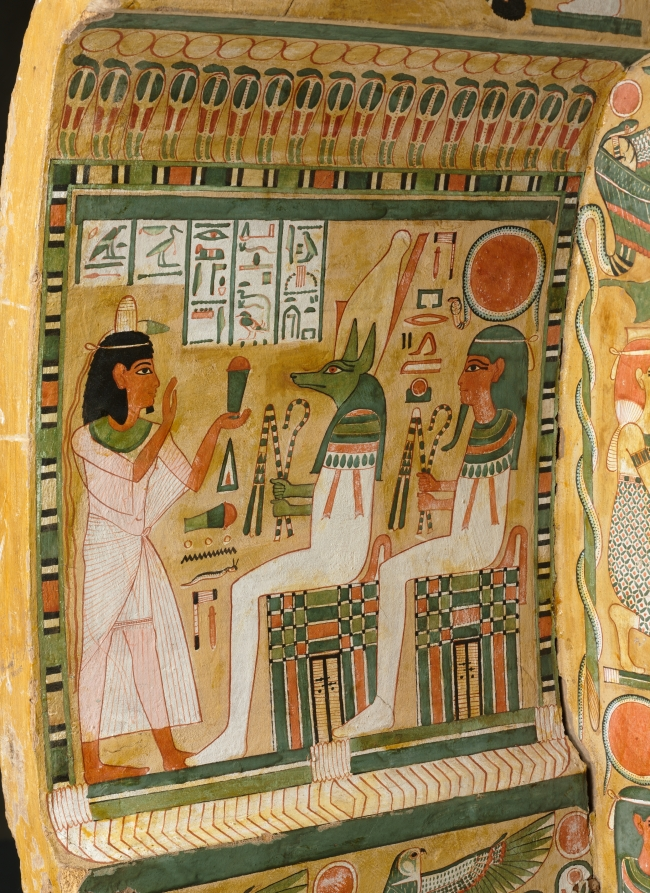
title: Coffin of Bakenmut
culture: Egypt, Thebes, Third Intermediate (1069–715 BCE), Dynasties 21–22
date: c. 1000–900 BCE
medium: gessoed and painted sycamore fig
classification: Funerary Equipment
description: The coffin of Bakenmut is one of the finest examples of painted wooden coffins made for the priests of Amen and their families at Thebes during Dynasty 21 and early Dynasty 22. The pharaohs of this time were no longer buried in the Valley of the Kings, but instead built tombs in the Delta, far to the north, where they resided. Security was lax in the Theban necropolis. The coffins and funerary goods of the wealthy citizens of Thebes were placed in unmarked and undecorated family tombs cut into the cliffs on the west bank of the Nile. All the care and detail that in more prosperous times were devoted to the decoration of the tomb chapel were now lavished on the elaborately painted coffins. Every available surface is crowded with religious scenes, images of funerary gods and goddesses, protective spells, and magical symbols. The deceased appears mummiform. An elaborate floral collar entirely covers the upper body, exposing only the separately attached hands (now lost). A pair of red "mummy braces" are crossed over the chest, their point of intersection marked by a winged sun disk. The lower body is covered with tiny figures modeled in gesso against a yellow background, which gives the effect of gold inlaid with glass or semiprecious stone. The decoration on the interior features two deified dead kings of Dynasty 18. Although these rulers had lived centuries before, memory of their greatness was still very much alive. The main scene near the top depicts Tuthmosis III, the great military pharaoh, who lived 500 years before Bakenmut. Posed as a mummy, the ruler wears a brilliant feathered garment enfolding him with falcon’s wings. The scene below features back-to-back seated images of Amenhotep I, regarded as the patron of the Theban cemetery and worshiped as a local god there.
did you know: Originally another smaller coffin was placed inside this outer coffin and in that the deceased with a mummy board would have rested.